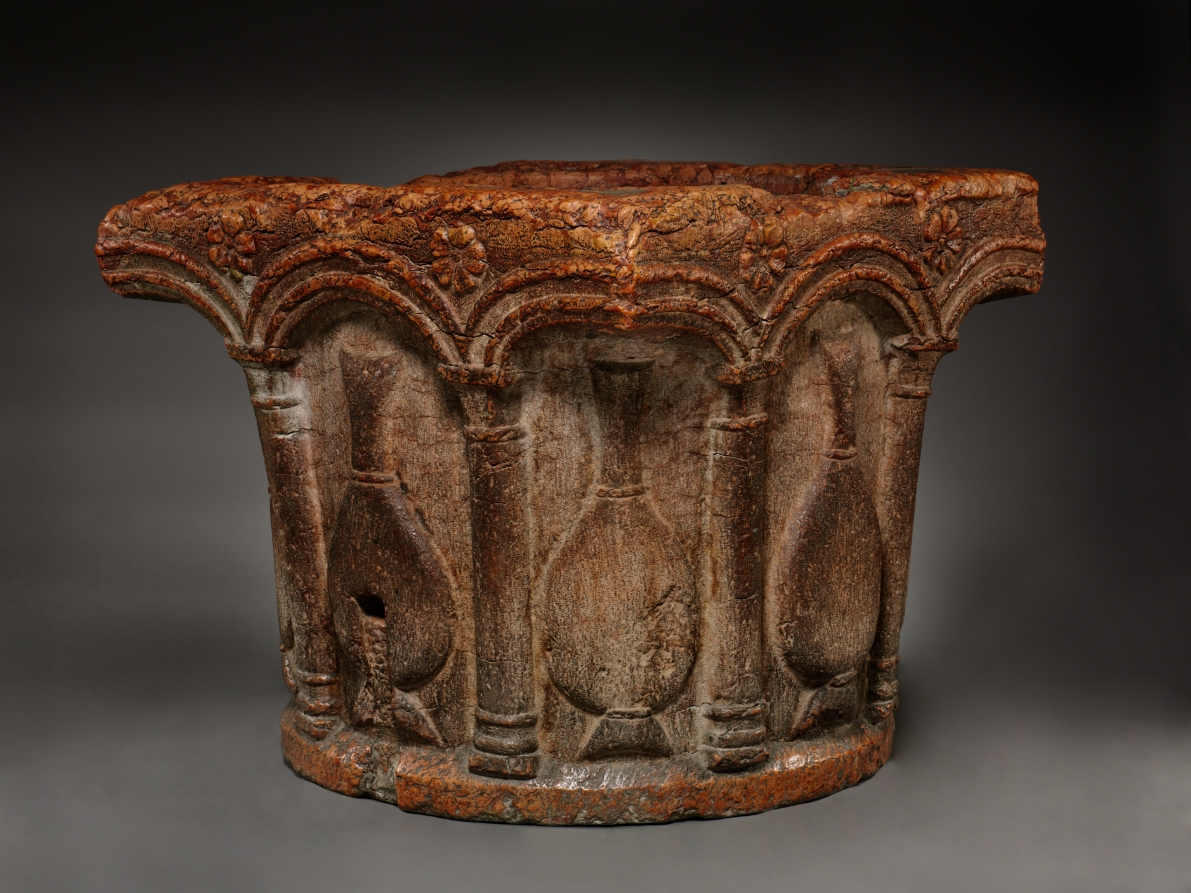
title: Well Head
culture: Italy, probably Verona, 15th century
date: 1400s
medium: pink limestone (called "Verona Marble")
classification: Sculpture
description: A well head is an architectural element that protects the mouth of a well. This example is both decorative and functional. The durable pink limestone well head facilitated access to the water whose restorative nature is echoed in the flowers and vases that ornament its surface.